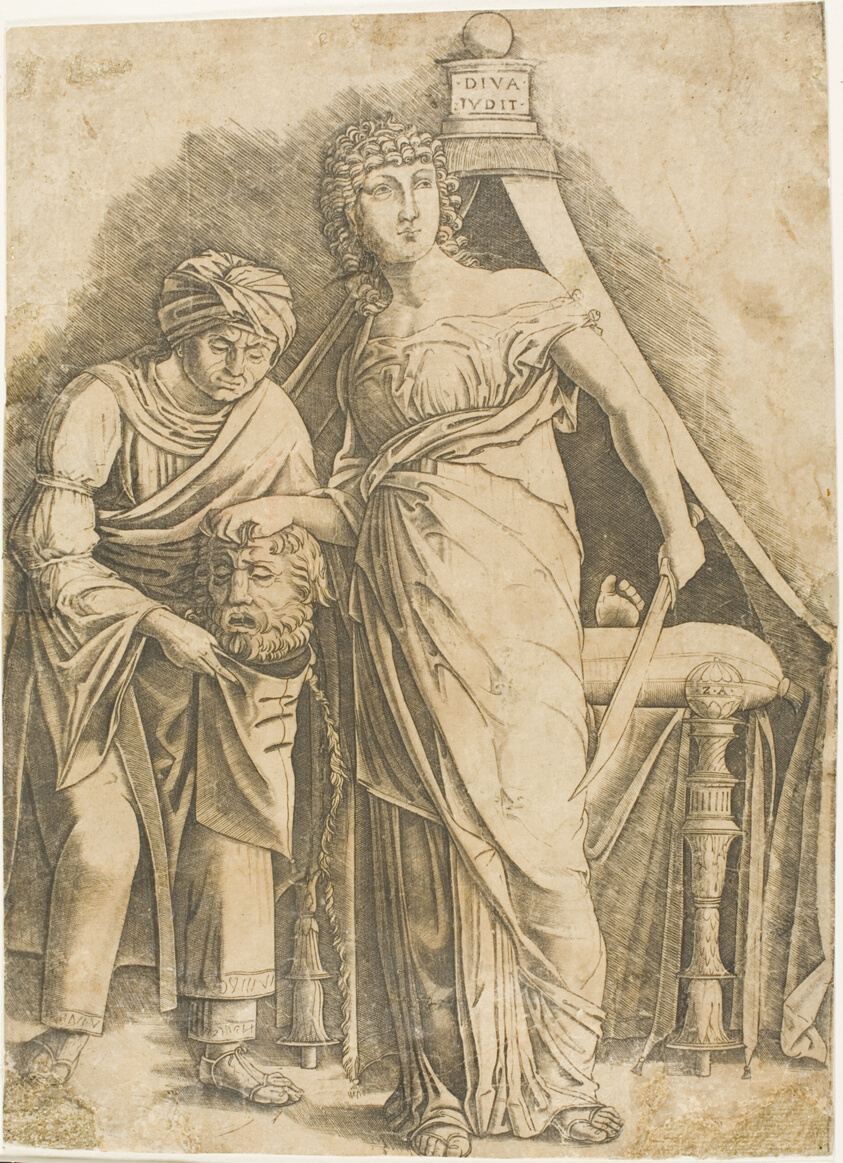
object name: Print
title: Judith with the Head of Holofernes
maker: Giovanni Antonio da Brescia (Italian, c. 1460-c. 1520); after Andrea Mantegna (Italian, 1430/31-1506)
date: c. 1497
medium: Engraving on paper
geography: Italy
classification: engraving; print; prints and drawing